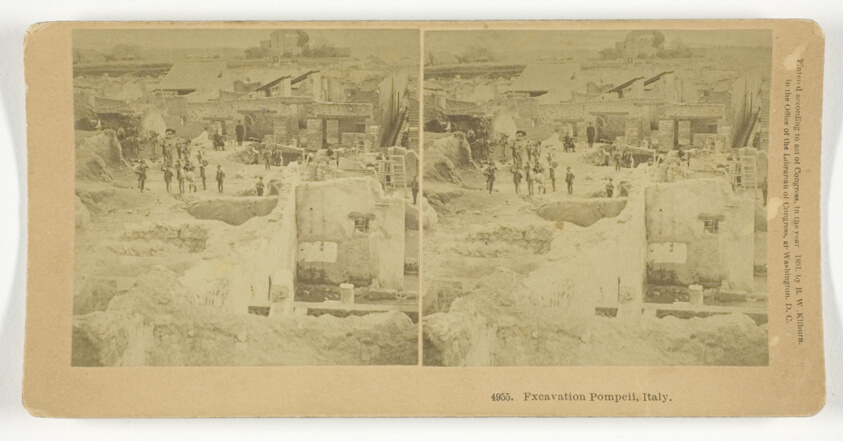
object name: Photograph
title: Excavation Pompeii, Italy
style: 19th century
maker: B. W. Kilburn; American, 1827–1909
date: 1891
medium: Albumen silver print, stereo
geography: United States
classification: stereograph (albumen); albumen silver print; photographic process; photography; photograph